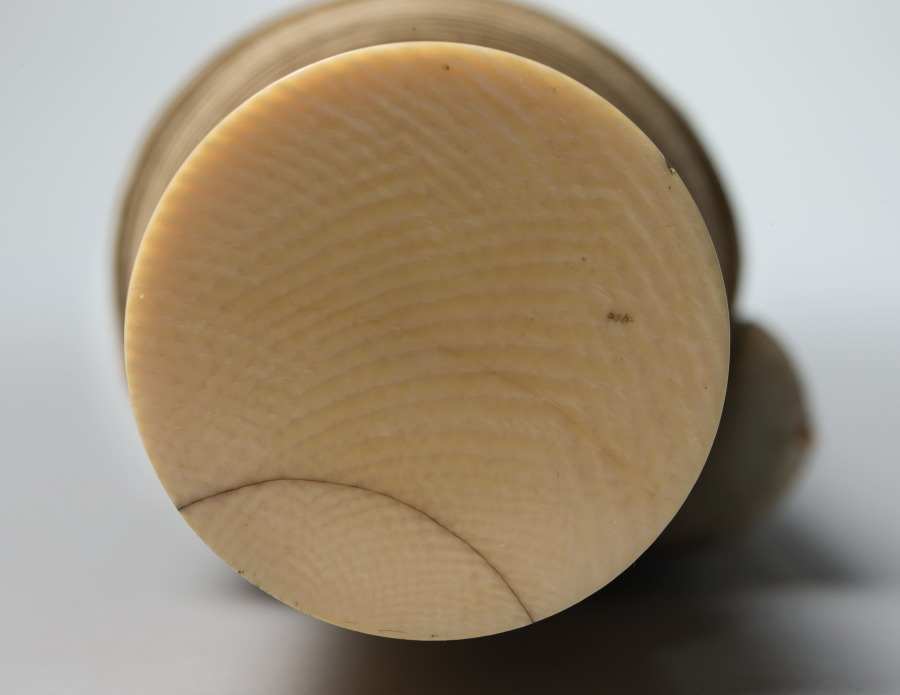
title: Solitary Colors of the Autumn Woods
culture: China, Ming dynasty (1368–1644)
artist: Wang Jianzhang (Chinese, active 1621–1662)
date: first half 1600s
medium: hanging scroll; ink and color on satin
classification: Painting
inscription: Artist's inscription, signature, and 2 seals: Cold frost falls on the fences,/ Solitary colors scatter the maples./ Reciting the chapter of "The Autumn Water,"/ I cannot still the emotion in my old heart. After the style of Fan Hua-yüan [Fan Kuan], Wang Chien-chang . [seals] Wang shih chih yin; Chien-chang. trans. LYSL/HK/WKH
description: Two gentlemen stand outside a thatched hut in a dense forest; some trees have bare branches indicating that the season is early autumn. Wang Jianzhang’s inscribed poem refers to a chapter called “Autumn Water” from Zhuangzi, a famous Daoist text written in the 3rd century BC: "Cold frost falls on the fences, / Solitary colors scatter the maples. / Reciting the chapter of “The Autumn Water,” / I cannot still the emotion in my old heart." Wang Jianzhang lived through the collapse of the Ming dynasty (1368–1644) and the rise of the Qing dynasty (1644–1911), when China was governed by the Manchus, an ethnic people from Manchuria who were traditionally viewed as “barbarians” by the Chinese. The poetic reference to Zhuangzi’s “Autumn Water” seems to discreetly convey Wang’s feelings about his country being taken over. “Autumn Water” was about learning to take steps in the foreign way, but not acquiring a foreign tongue. Perhaps Wang was lamenting his conflicted situation. For survival he had to adapt to the new political and social climate, while still trying to maintain his own identity and Chinese traditions.